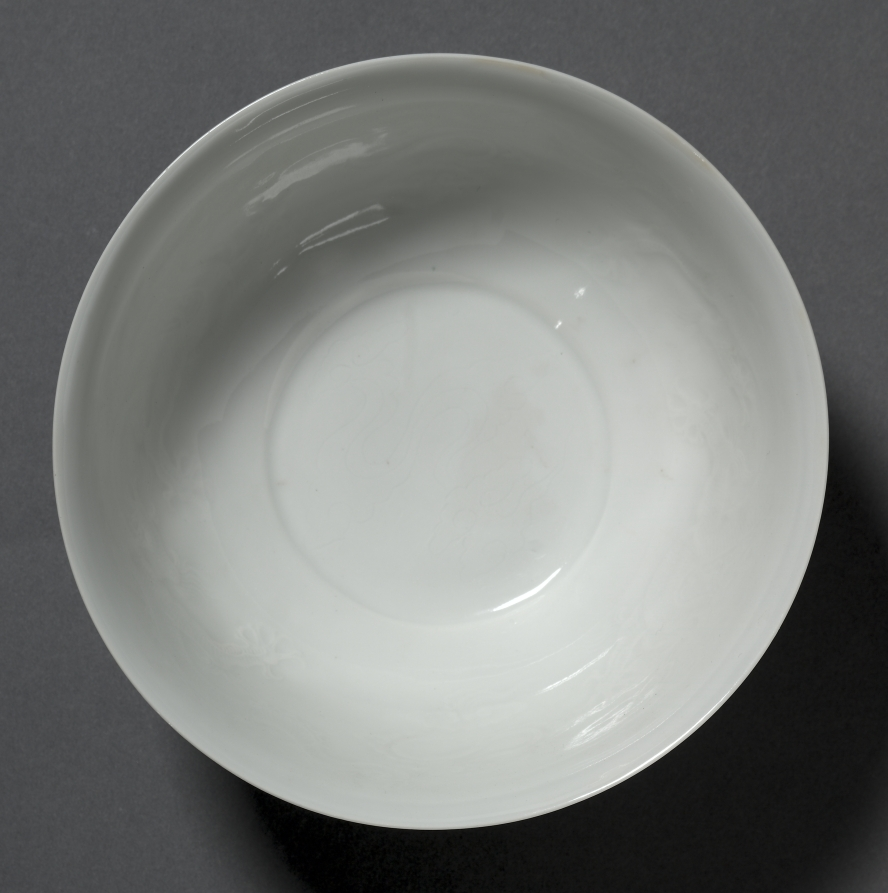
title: Bowl with Dragons and Clouds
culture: China, Jiangxi province, Jingdezhen, Ming dynasty (1368-1644), Yongle period (1403-1424)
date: 1403–1424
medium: porcelain with molded and incised decoration and white glaze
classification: Ceramic